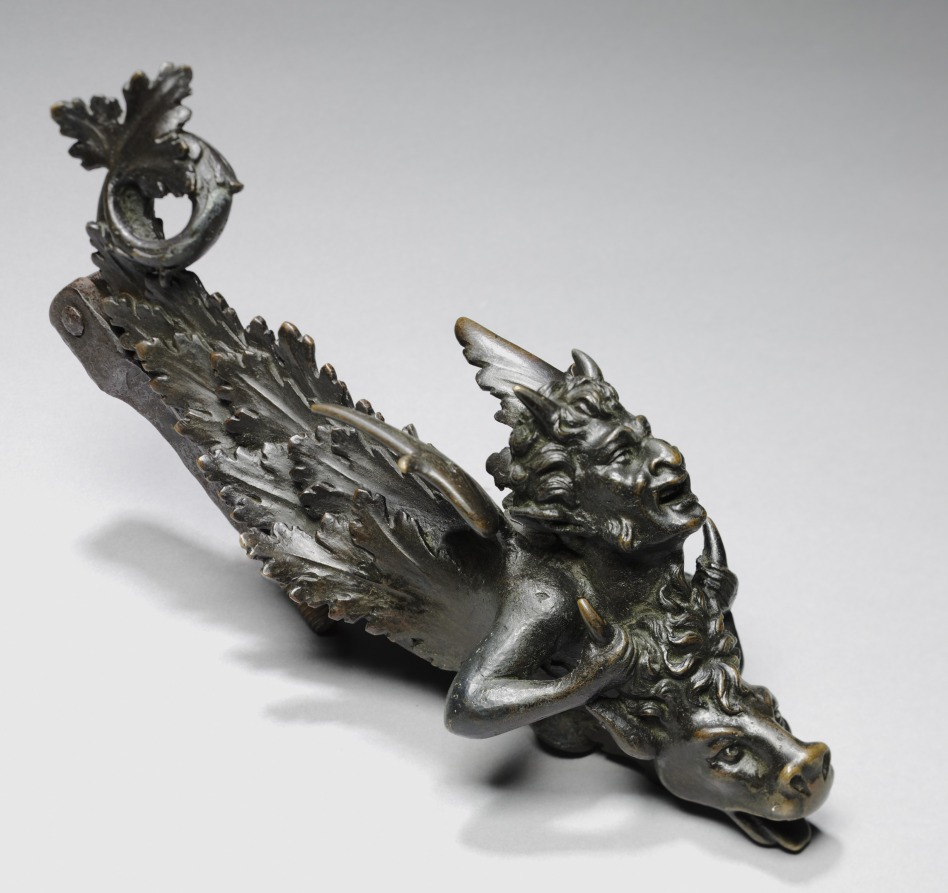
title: Doorknocker with a Satyr Pulling an Ox's Horns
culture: Italy, early 16th Century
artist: Andrea Riccio (Italian, c. 1470–1532)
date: 1800s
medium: bronze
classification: Sculpture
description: Fanciful bronzes such as this one were extremely popular in the late 1500s in the north of Italy, where sculptors such as Andrea Riccio and Severo da Ravenna often featured bizarre imaginary creatures in their sculptures. These artists exerted a long-lasting influence on their peers and followers for the remainder of the 1500s. However, this sculpture was not made in the 1500s. Based on the weight and style of the Doorknocker, it is most likely that it was made in the 1800s to mimic the style of Riccio and his followers. This sculpture is solid; in the 1500s artists created hollow sculptures to reduce the costs of the object and to decrease the chances of flaws in the sculpture. However, in the 1800s when better bronze casting technology evolved and the price of the metal was less costly, artists created solid bronze sculptures based on sixteenth-century designs. In particular, there was a considerable market in England for Renaissance revival doorknockers to be used decoratively on pub doors.